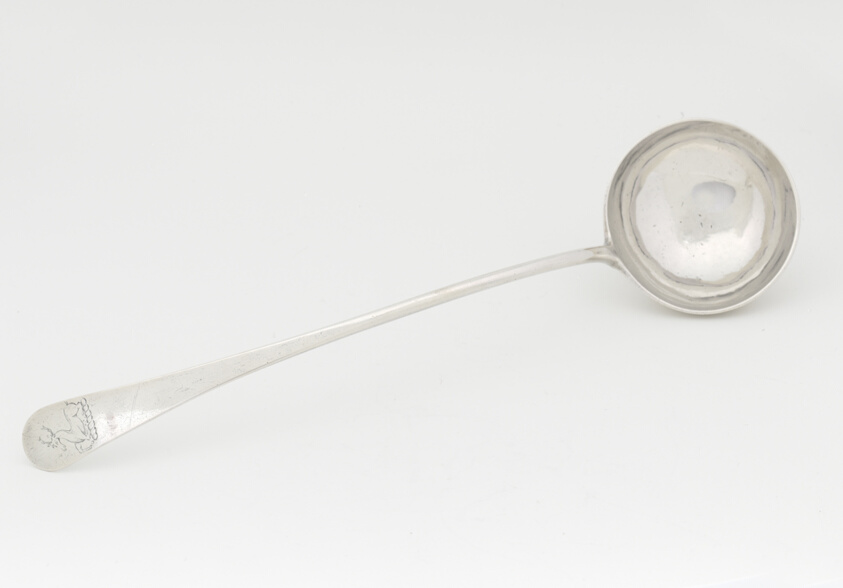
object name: Metalwork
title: Ladle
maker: William Hollingshead; American, active 1754–1785; Philadelphia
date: 1757–67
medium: Silver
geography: Philadelphia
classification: ladle; utensil for serving food; utensil; silver; american decorative arts; american arts; decorative arts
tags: dining, drinking